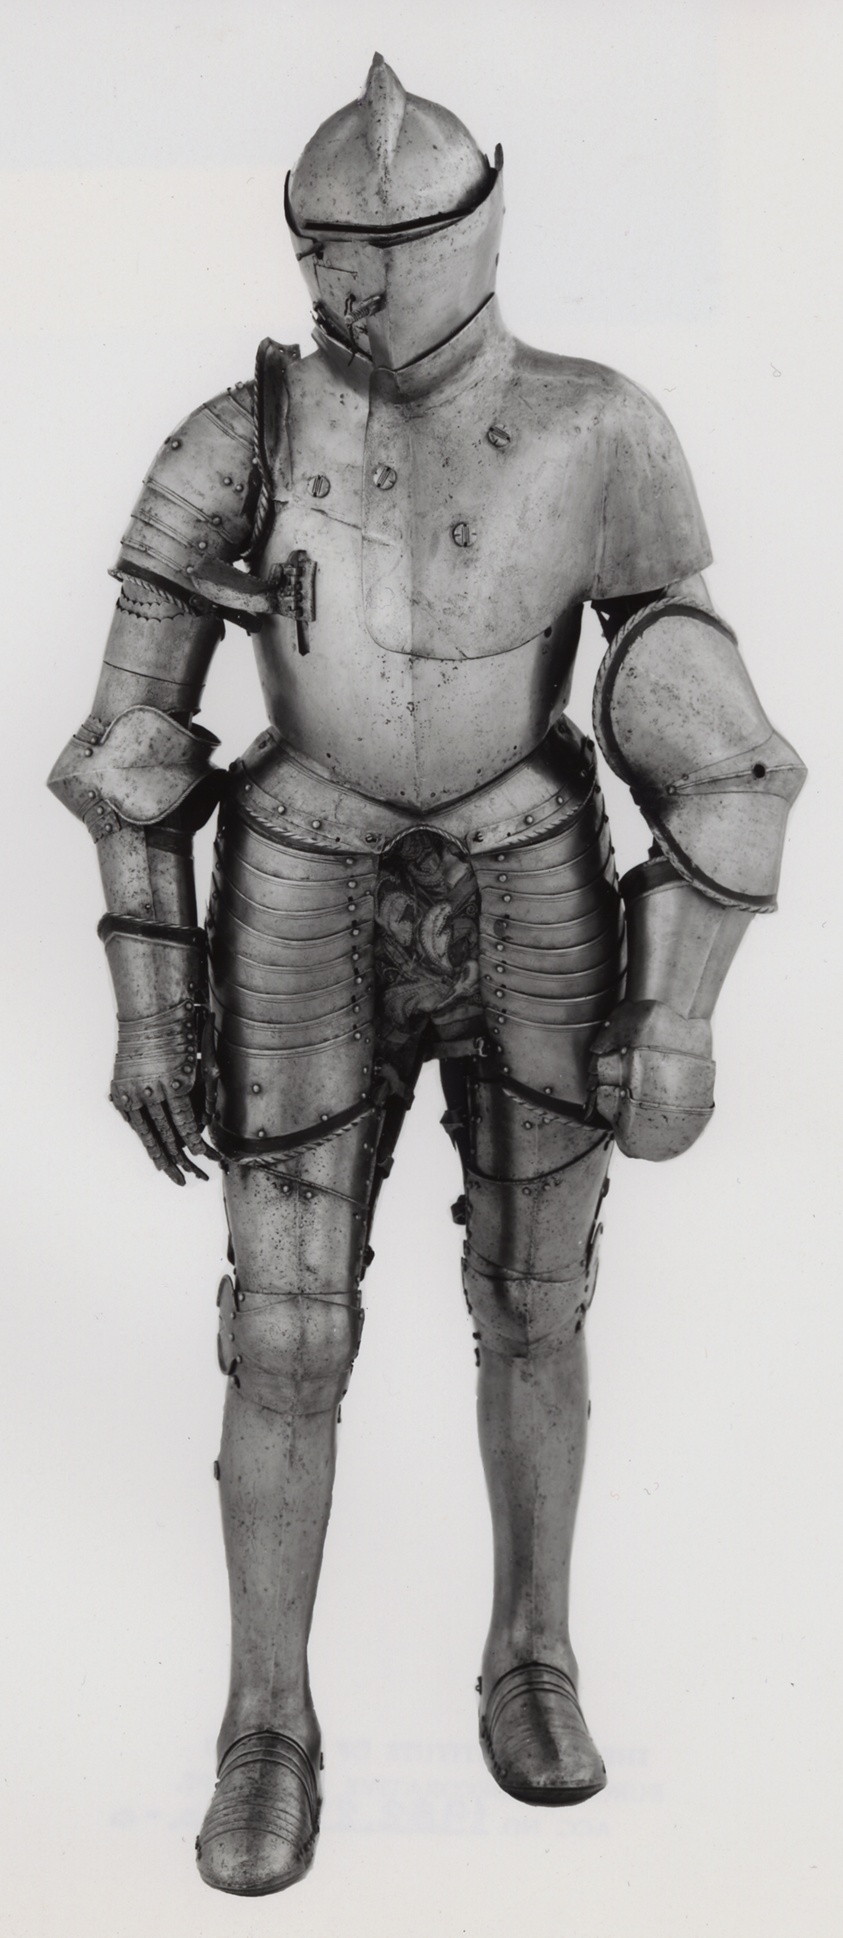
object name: Armor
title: Portions of a Jousting Armor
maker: Italian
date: c. 1560 with some modern restorations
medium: Steel, leather, and paint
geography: Italy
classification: suit; armor; arms and armor